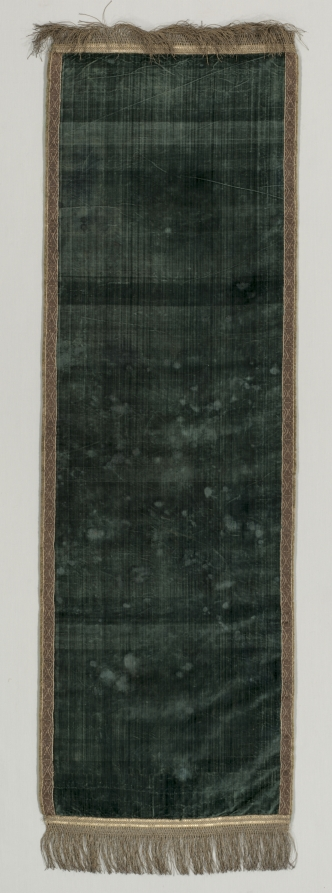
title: Length of Velvet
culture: Italy, 17th century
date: 1600s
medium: velvet; silk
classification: Velvet